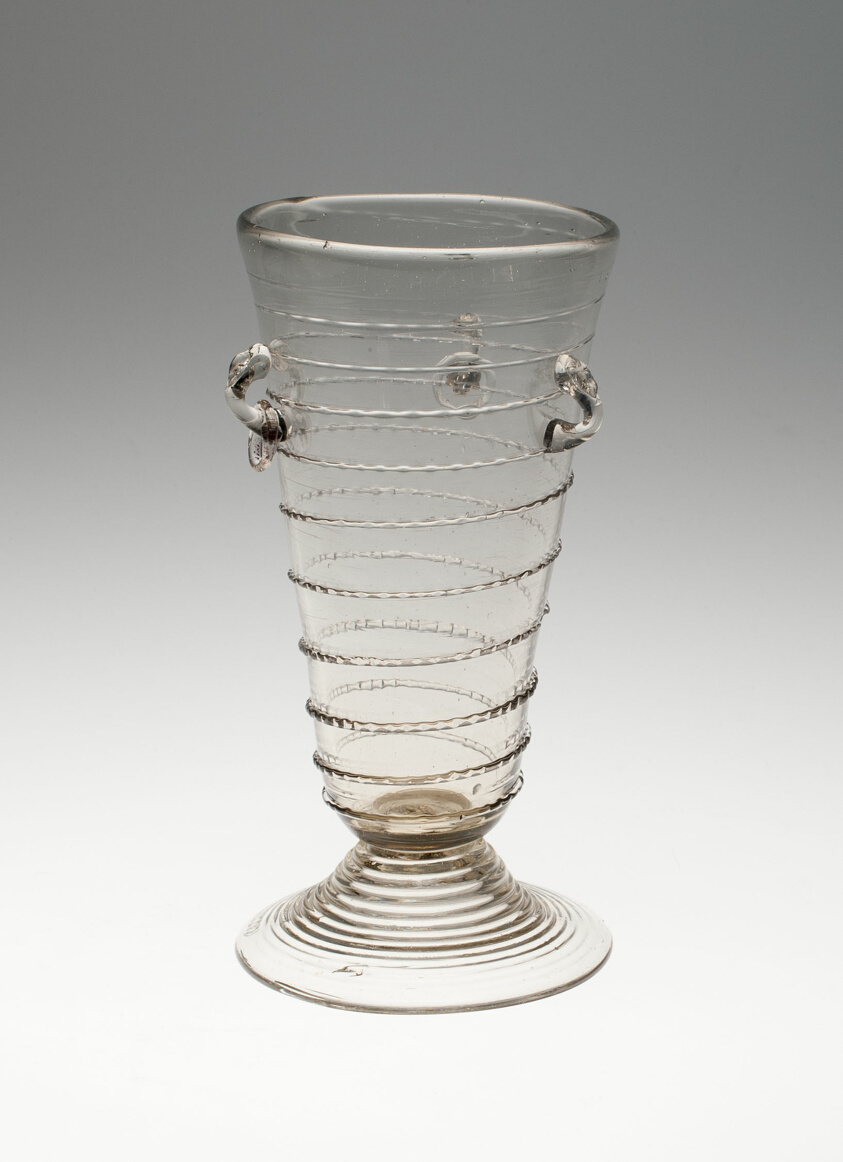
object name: Glass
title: Passglass with Loops and Glass Rings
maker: Germany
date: 1600/1700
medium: Glass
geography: Germany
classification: drinking vessel; glass; european decorative arts